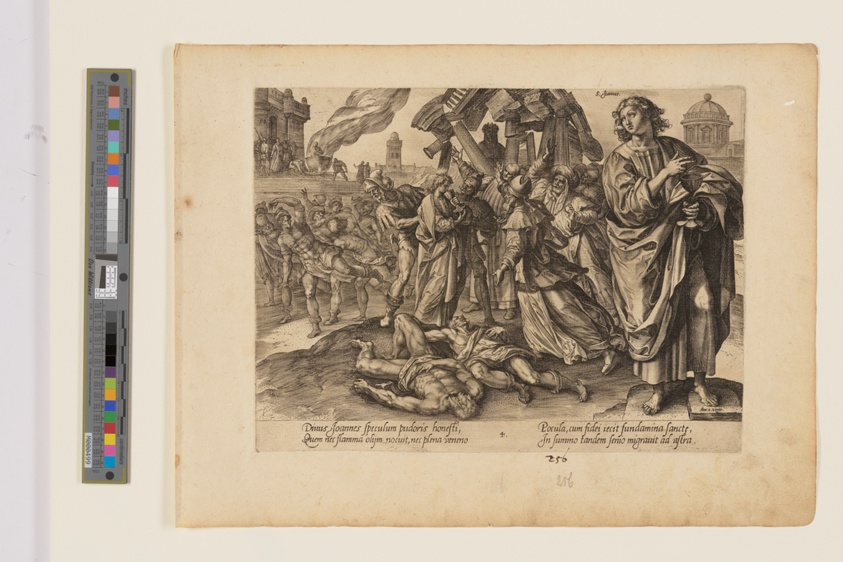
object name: Print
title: The Martyrdom of St John, from The Martyrdom of Christ and the Apostles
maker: Hendrick Goltzius (Dutch, 1558–1617); after Maarten de Vos (Flemish, 1532–1603); published Hieronymus Cock (Netherlandish, c. 1510–1570)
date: c. 1578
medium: Engraving on ivory laid paper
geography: Netherlands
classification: engraving; paper; print; prints and drawing